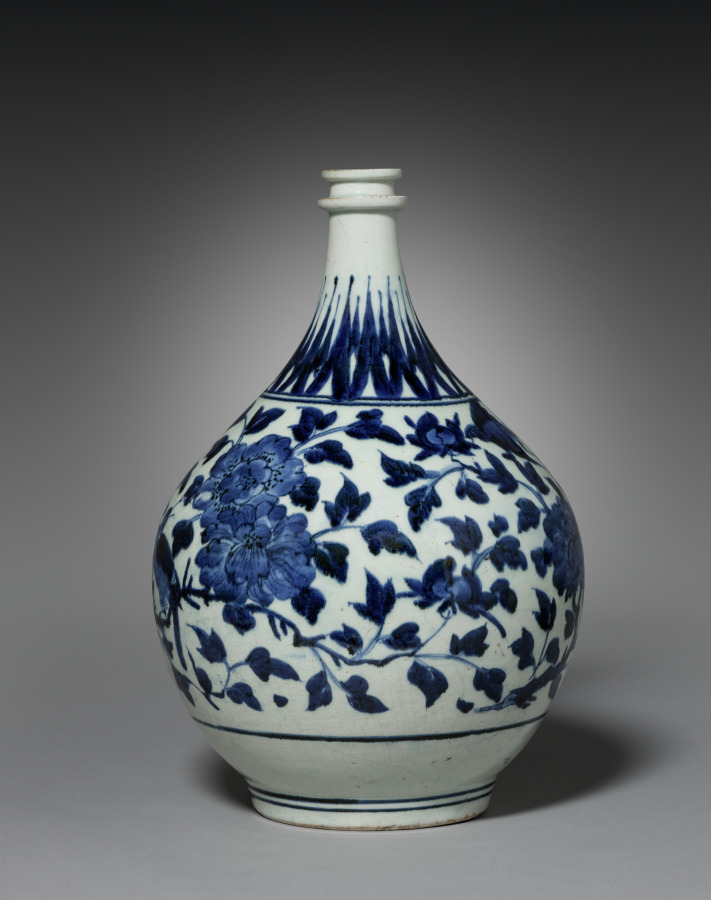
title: Medicine Bottle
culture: Japan, Edo period (1615–1868)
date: 1670s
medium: porcelain with underglaze blue decoration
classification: Ceramic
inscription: "I.C." on bottom (probably made for Joannes Camphuys, 1634–1695).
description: While inspired by medicine jars used in European pharmacies, this bottle was likely decorative. It may have been exported by the Dutch East India Company, a powerful trading company from the Netherlands. In Japan, it operated from Deshima, a man-made island in Nagasaki harbor created in 1636. The initials “I. C.” appear on the base. As the letter J was often transposed with the letter I in Europe of the 1600s, some scholars believe the bottle may have been made for Johannes Camphuys (1634–1695), who was in charge of the Dutch East India Company’s operations in Deshima in 1671.